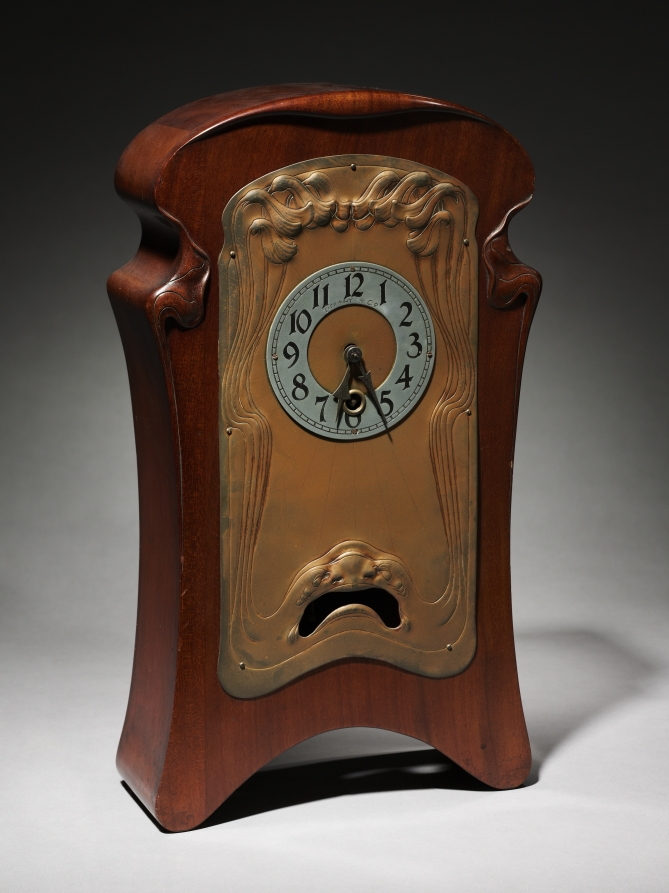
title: Mantle Clock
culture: America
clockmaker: Lenzkirch Clock Factory (German)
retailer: Tiffany & Co. (America, New York, est. 1837)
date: 1901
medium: brass, mahogany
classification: Wood